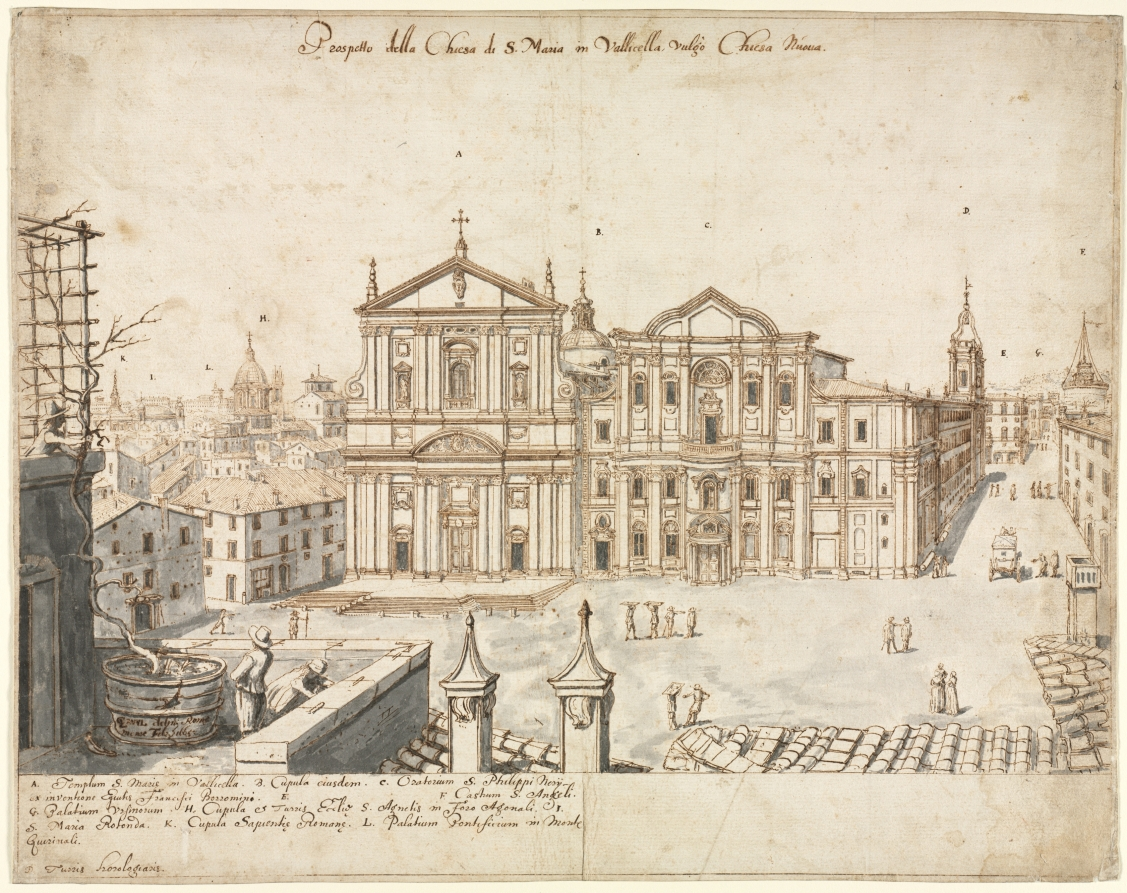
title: Eighteen Views of Rome: The Church of Santa Maria in Vallicella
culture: Flanders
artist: Lievin Cruyl (Flemish, c. 1640-c. 1720)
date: 1665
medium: pen and brown ink and brush and gray wash over graphite; framing lines in brown ink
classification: Drawing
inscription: signed, lower left, in brown ink: [artist's monogram: LC] RVYL delin Romæ / mense Febr. 1665. ; by artist, upper center, in brown ink: Prospetto della Chiesa di S. Maria in Vallicella vulgò Chiesa Nuova ; by artist, throughout composition, in brown ink: [the letters A-L] ; by artist, lower left, in brown ink: A. Templum S. Mariæ in Vallicella. B. Cupula eiusdem. C. Oratorium S. Phiilippi Nerij / ex inventione Equitis Francisci Borromini. E. F. Castrum S. Angeli. / G. Palatium Ursinorum. H. Cupula et Turris Eccliæ S. Agnetis in Foro Agnoli. I. / S. Maria Rotonda. K. Cupula Sapientiae Romanae. L. Palatium Ponteficium in Monte / Quirinali. / D. Turris horologiaris ; VERSO, upper left, in black chalk: 545 ; ON STRIPS OF PAPER MOUNTED TO VERSO, lower center, in graphite: A20979 ; lower right, in graphite: E. 13